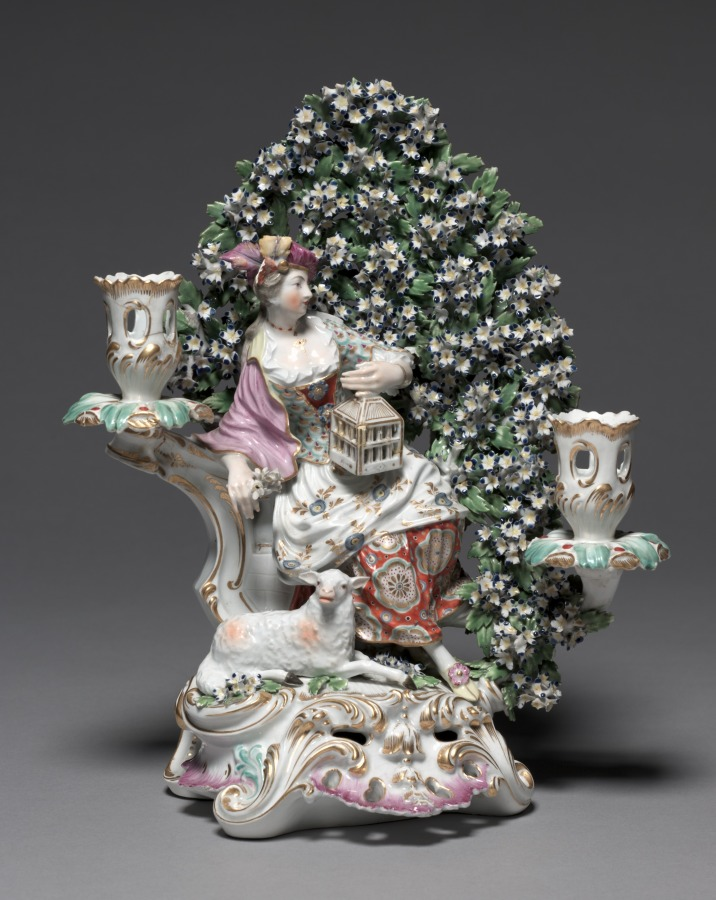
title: Pair of Candelabra Depicting Allegorical Figures of Liberty and Matrimony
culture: England, London, Chelsea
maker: Derby Porcelain Factory (Chelsea-Derby Period, 1770–84)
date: c. 1775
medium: soft-paste porcelain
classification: Ceramic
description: This pair of allegorical figures depicts the attributes of solitude and marriage as a shepherd and shepherdess adorned in richly patterned designs. Here “Liberty” (the shepherd), is accompanied by a dog and a bird that perches on his outstretched arm. In contrast “Matrimony” (the shepherdess) holds a birdcage in one hand and subtly directs the viewer’s gaze toward the sheep resting nearby with the other.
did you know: The canopy of foliage surrounding these figures was inspired by the arbors popular in theatrical stage designs during the mid-1700s.